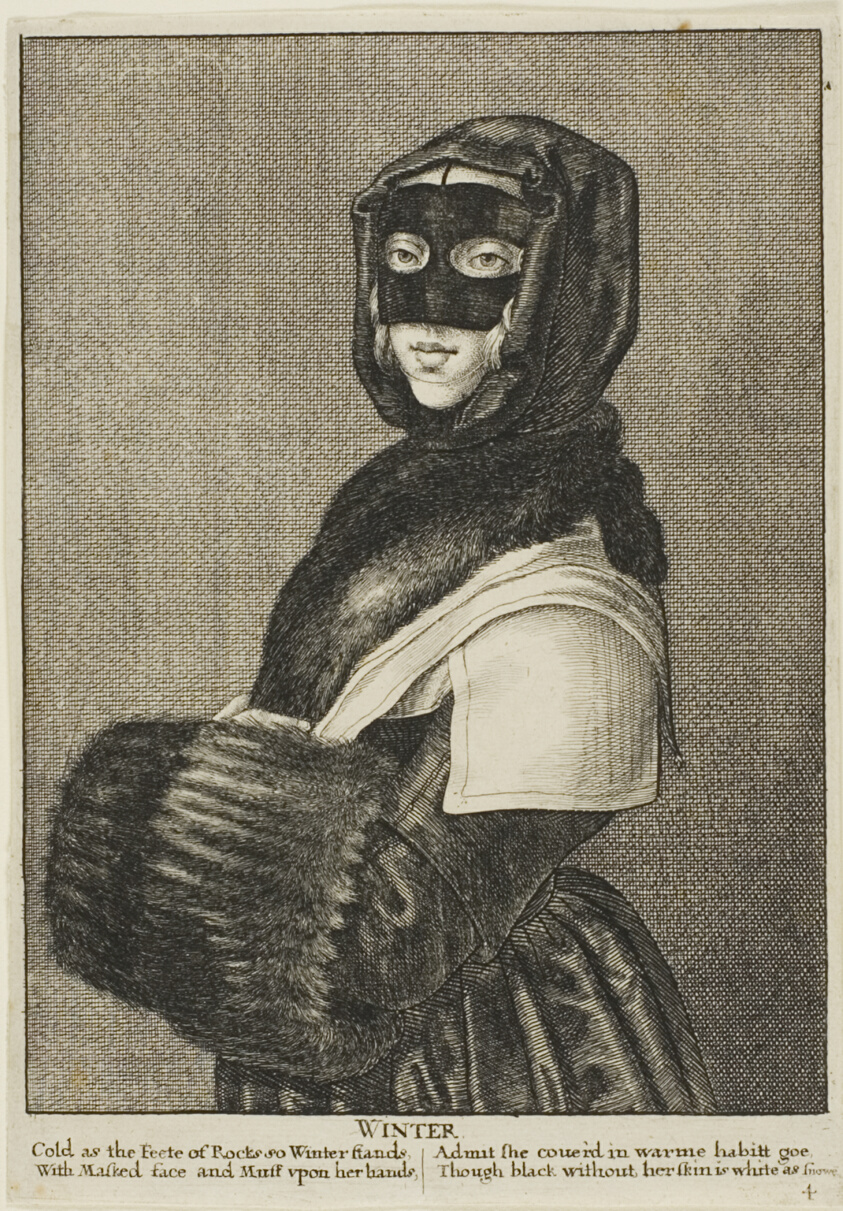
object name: Print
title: Winter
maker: Wenceslaus Hollar (Bohemian, 1607-1677)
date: 1644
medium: Etching on ivory laid paper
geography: Bohemia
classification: etching; print; prints and drawing